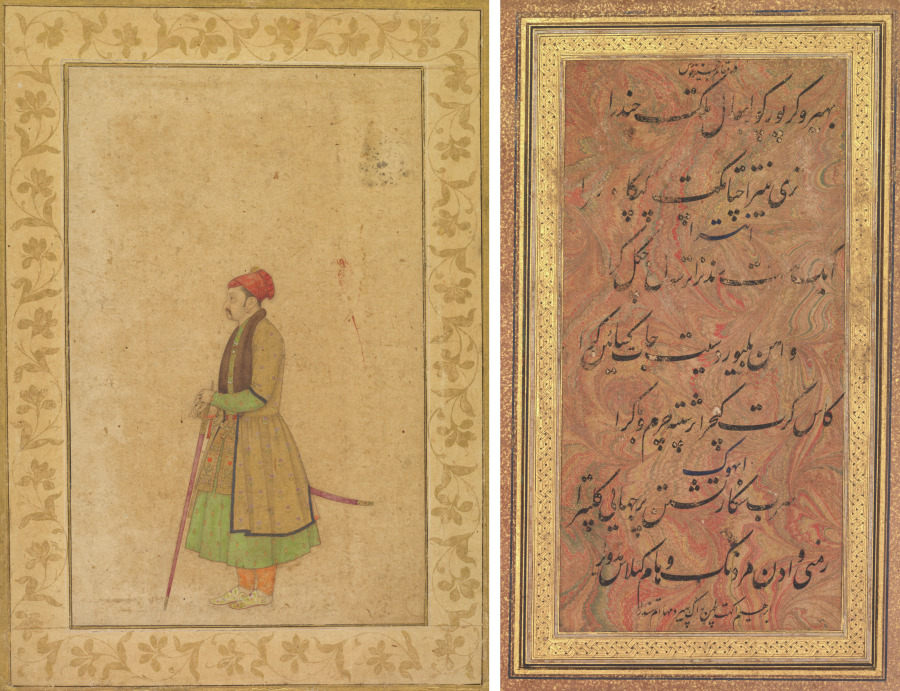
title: Portrait of Raja Ram Singh of Amber (r. 1667-1688) with a Deccan Sword (recto); Calligraphy (verso)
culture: India, Mughal court, 17th century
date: c. 1680–1685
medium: Gum tempera, ink, and gold on paper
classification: Painting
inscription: verso: Deccani Urdu (Karnati) lyrics in nasta‘liq script: “Bhairava” has a camphor-like fair complexion with [young] moon on the forehead and three eyes and with the crown of the matted locks over which the Ganges sparkles. In the one hand he has a human skull, and in the other a trident. His vehicle is a bull, and his body is white (besmeared with ashes). He has the skin of an elephant and of a lion on his back and carries ornaments provided by snakes and sits under the shade of the heavenly wish-fulfilling tree [kalpavriksha]. A white beautiful woman is playing upon a drum [mridanga] at a place beyond Kailash mountains. These, says Ibrahim, are the features of the most charming and excellent Raga Bhairava. (after Kitab-i Nauras Ahmad 1956, 98–99, 130)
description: The sensitive, naturalistic rendering of weariness and forbearance in the face belies the trappings of favor bestowed on Ram Singh by the Mughal emperors Shah Jahan and Alamgir, whom he served as courtier and general between 1643 and 1688. He was a Hindu ruler from the kingdom of Amber in Rajasthan, under the control of the Mughal empire. Spending most of his life at the imperial court or leading military expeditions for the Mughals, this portrait was included in a Mughal album and inscribed with an Urdu verse indicating his value to the empire: "wherever he has led an expedition, victory is his." He wears a sumptuous coat of honor with a fur collar, woven with gold threads and floral sprigs and costly rubies, emeralds, and pearls. The straight sword with enameled hilt may be the one gifted to him by the emperor upon his succession to the throne as king of Amber in 1667. His long history of service at the imperial court, however, was checkered with troubles, including his allegiances with failed successors of Shah Jahan and the escape of the rebel Shivaji under his watch.